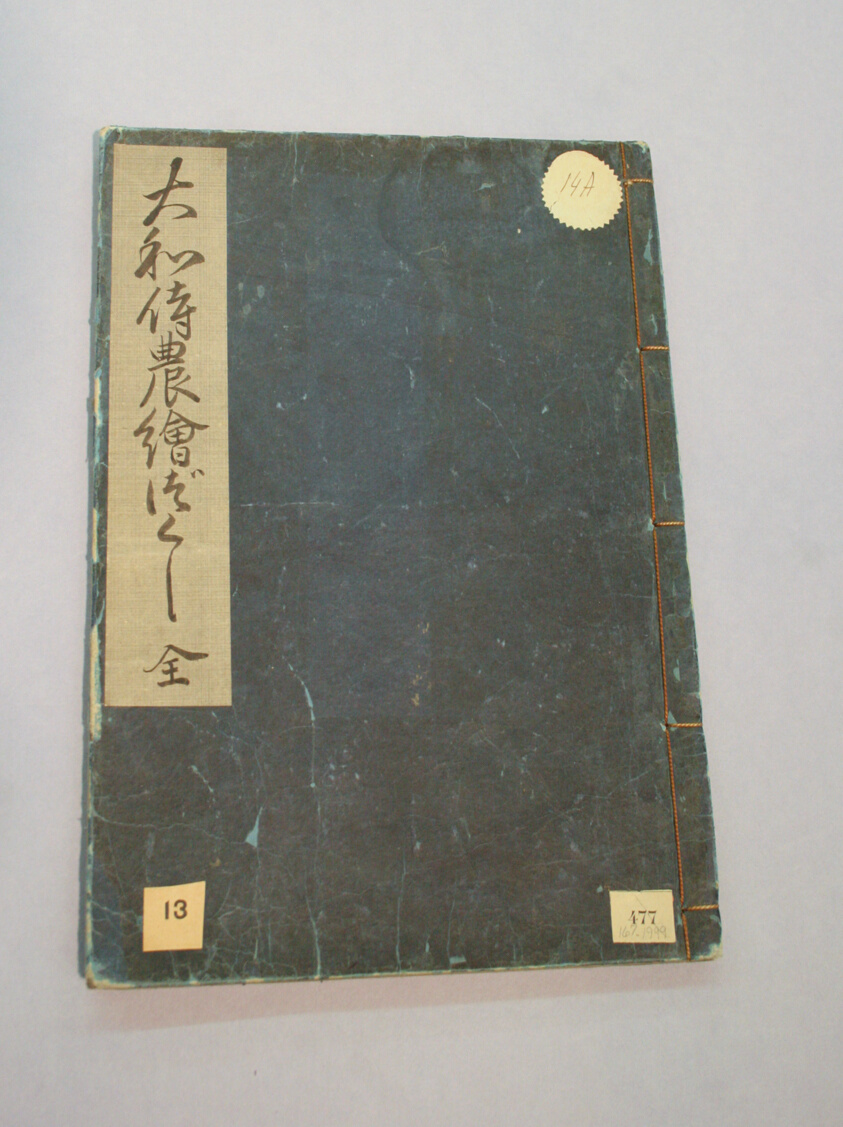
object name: Book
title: Yamato shinoe zukushi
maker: Hishikawa Moronobu (Japanese, died 1694)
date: 1686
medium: Woodblock printed book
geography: Japan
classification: book; asian art